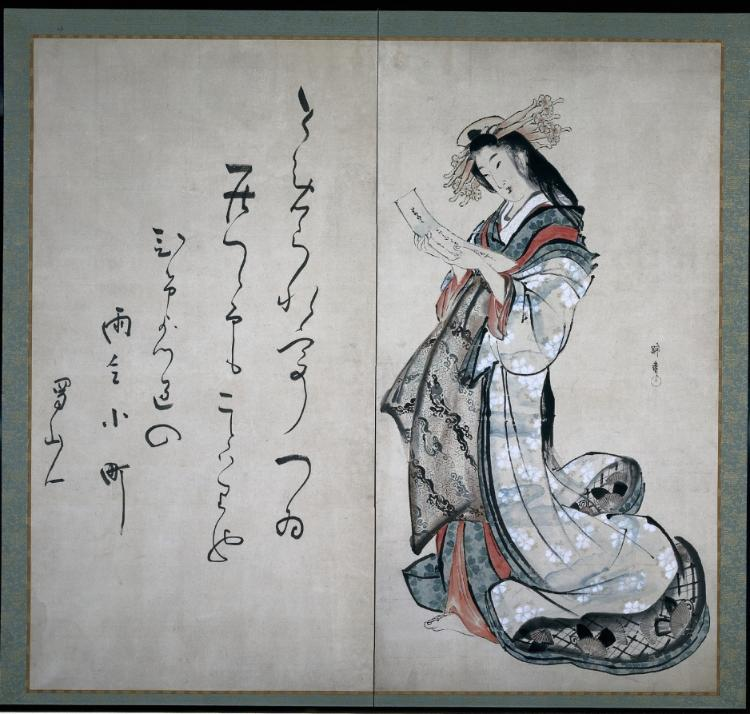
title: Courtesan Reading a Letter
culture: Japan, Edo period (1615–1868)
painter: Teisai Hokuba (Japanese, 1771–1844)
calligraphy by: Ōta Nanpo (Japanese, 1749–1823)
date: early 1800s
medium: two-panel folding screen; ink and color on paper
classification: Painting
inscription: painting: Signed: Teisai. Sealed: Hokuba. calligraphy: Signed: Shokusanjin.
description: Ukiyo-e artists and collaborating poets introduced imagery from classical literature to add layers of meaning to their work. Here, a courtesan pores over a letter from an admirer, and the poem next to her reads as follows: "Having been asked to stay over, / I stayed on—and for a good reason. / It’s way past midnight / and the lady is that (legendary implorer) Amagoi Komachi." Midnight was closing time in Yoshiwara, the licensed brothel district of Edo (now Tokyo). Amagoi, or “Praying for Rain,” Komachi refers to ninth-century poet Ono no Komachi—known for her compelling verse and great beauty—and one of her famous compositions.